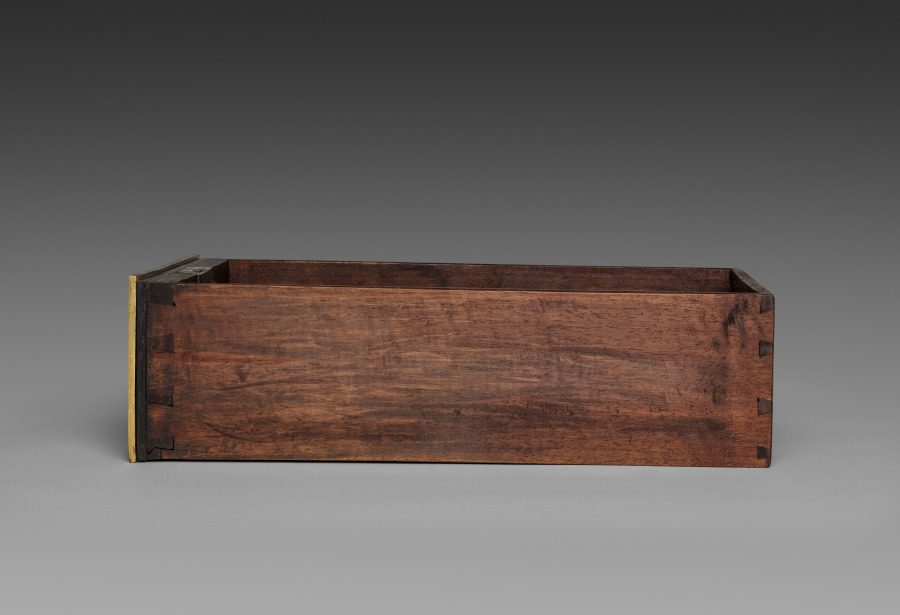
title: Side Drawer for Cabinet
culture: France, late 17th Century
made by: André-Charles Boulle (French, 1642–1732)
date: c. 1690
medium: ebony, marquetry in metal and tortoise shell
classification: Furniture and woodwork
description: Appointed cabinetmaker to King Louis XIV in 1672, André-Charles Boulle became a master of furniture making in France during the late 1600s until his death in 1732. Known primarily for his use of marquetry, in which metal patterns are inlaid into tortoiseshell then applied within the veneered surface of the furniture, Boulle established a level of quality and craftsmanship few others could achieve. As a result, his work found favor at the royal court and among other aristocrats and diplomats eager to impress the king. The inclusion of a medallion depicting Louis XIV within the bronze decoration of this chest would have identified the owner with the royal court. Often exhibiting stout architectural proportions with elegant groups of inlaid motifs such as the parrot on the central panel of this chest, Boulle’s designs are an example of the intellectual fashion for contrasting ideas, materials, and motifs.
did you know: Originally designed to sit atop an elaborate tall stand, this chest was likely altered in the late 1700s to reduce its scale and height.